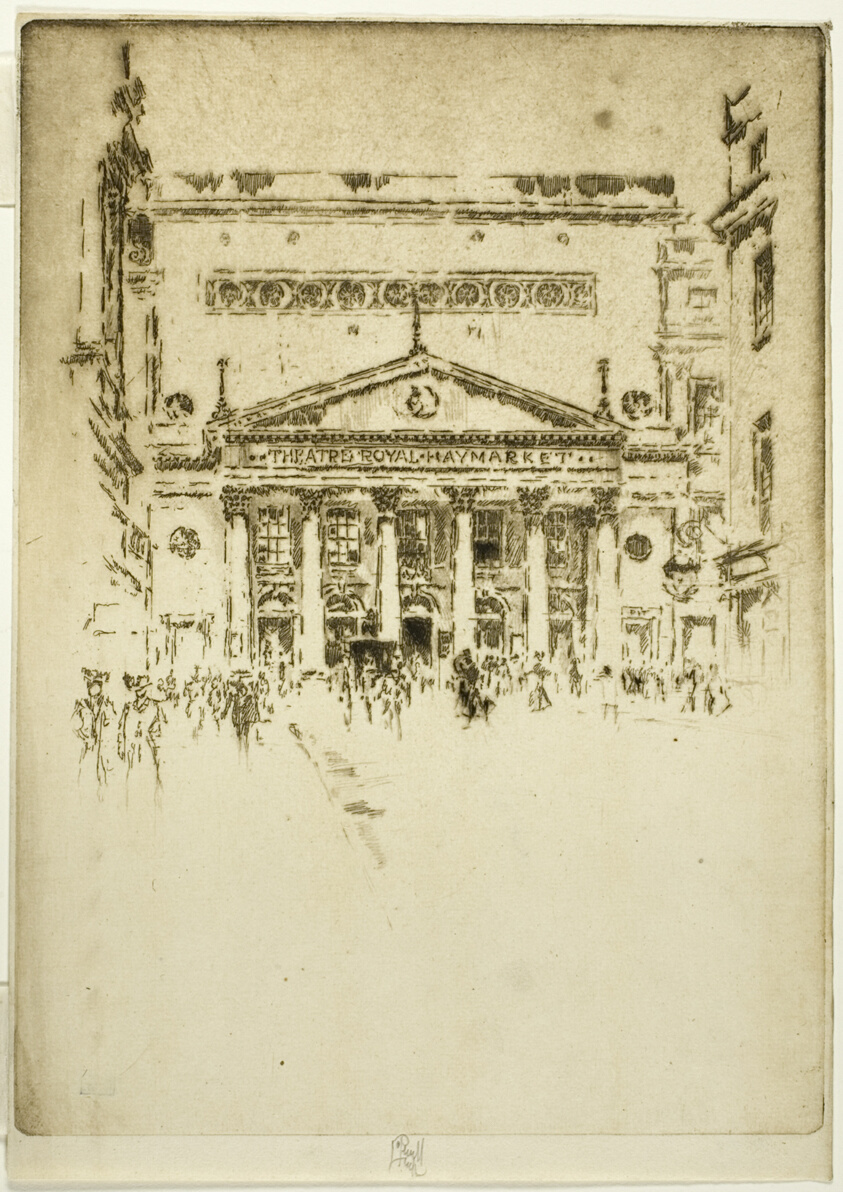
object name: Print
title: Royal Haymarket Theatre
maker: Joseph Pennell (American, 1857-1926)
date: 1906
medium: Etching on ivory laid paper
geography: United States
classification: etching; print; prints and drawing